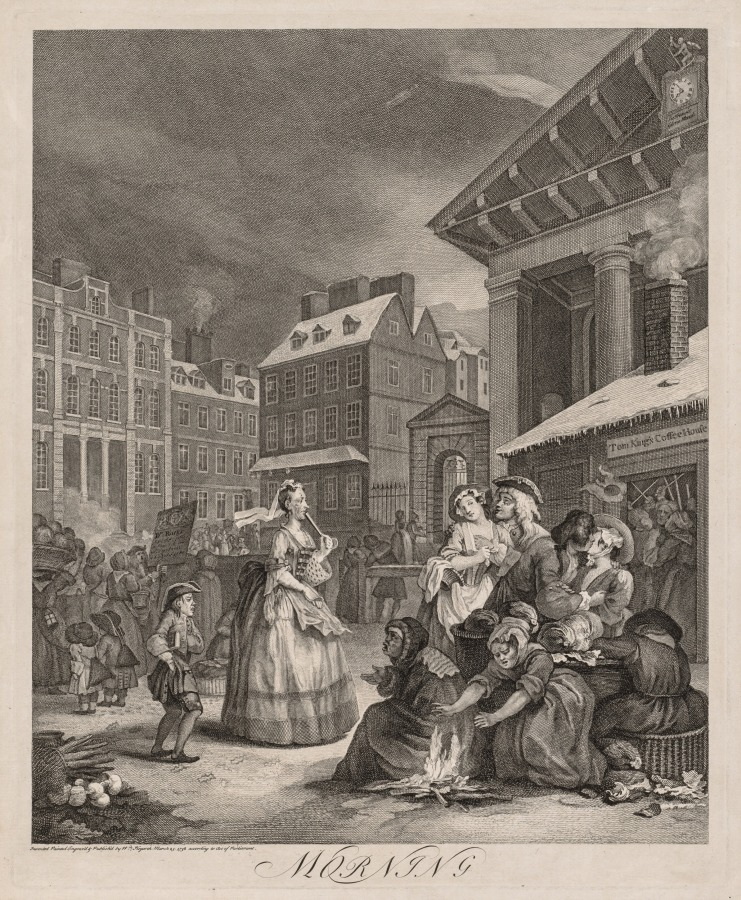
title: The Four Times of Day: Morning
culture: England, 18th century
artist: William Hogarth (British, 1697–1764)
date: 1738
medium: engraving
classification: Print